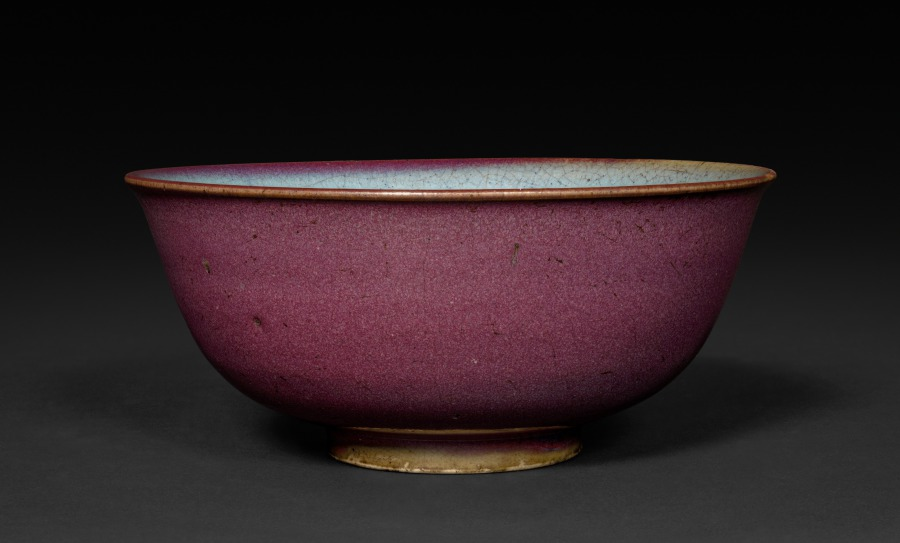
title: Bowl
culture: South China, Yuan dynasty (1271–1368) to Ming dynasty (1368–1644)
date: 1300s–1400s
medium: glazed gray stoneware, Jun ware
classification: Ceramic